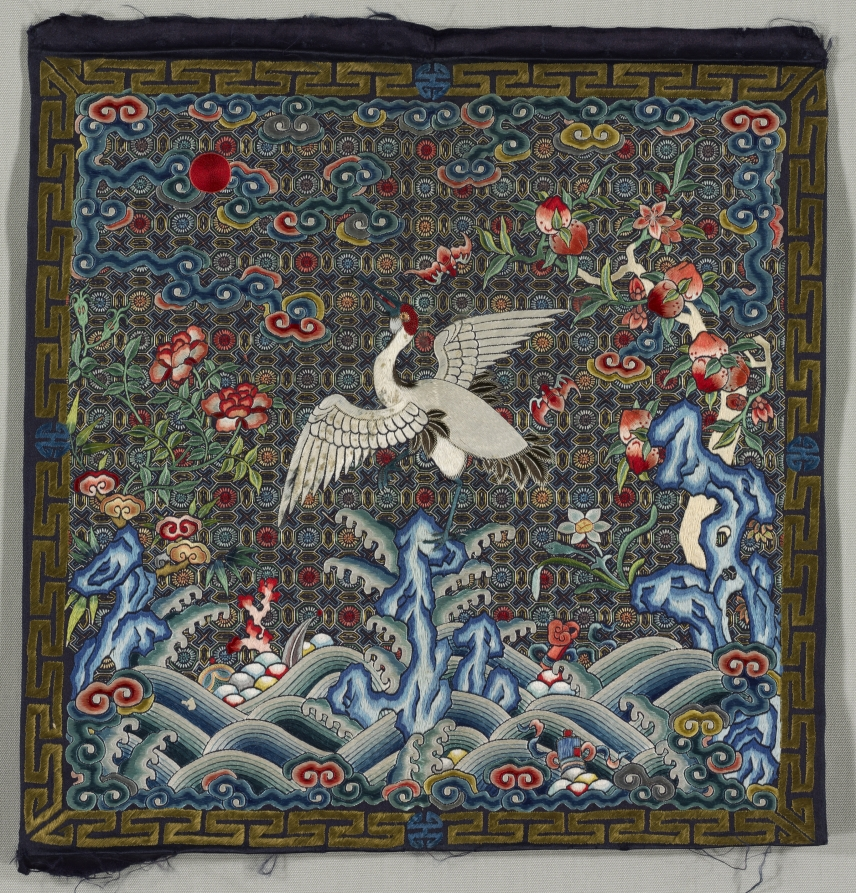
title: Rank Badge (buzi)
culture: China, Qing dynasty (1644–1911), Qianlong reign (1736–95)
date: 1736–95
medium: silk, satin weave; silk embroidery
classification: Embroidery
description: Rank badges (also called rank insignia or Mandarin squares) were used in China during the Ming (1368–1644) and Qing (1644–1911) dynasties to demonstrate the wearer’s rank. In 1391 new clothing regulations directed court officials to wear decorative squares indicating their rank—birds for civil officials and animals for military officials. During the Qing dynasty rank badge design was regulated, and certain creatures were associated with specific ranks. Qing badges depict a representation of the universe with a landscape and a central creature, surrounded by clouds and facing the sun. The sun represented the emperor and this composition showed the official’s loyalty to him. An official’s wife wore rank badges that mirrored her husband’s. Most of the examples in CMA’s collection depict creatures facing a sun on the left. Attached to the front and back of a ceremonial robe, rank badges were woven in pairs with identical imagery. One was divided vertically up the center to attach to the front of a robe with a center opening. Rank badges are generally square or rectangular, although round examples exist. They are typically satin weave or slit tapestry weave (kesi) silk. Satin weave badges often have dark backgrounds with silk and/or metal thread embroidery. Some badges incorporate peacock feathers or beads. Late in the Qing dynasty appliqué replaced embroidery to allow for quicker production and a change in rank.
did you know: A rank badge with a crane indicates a first rank civil official.